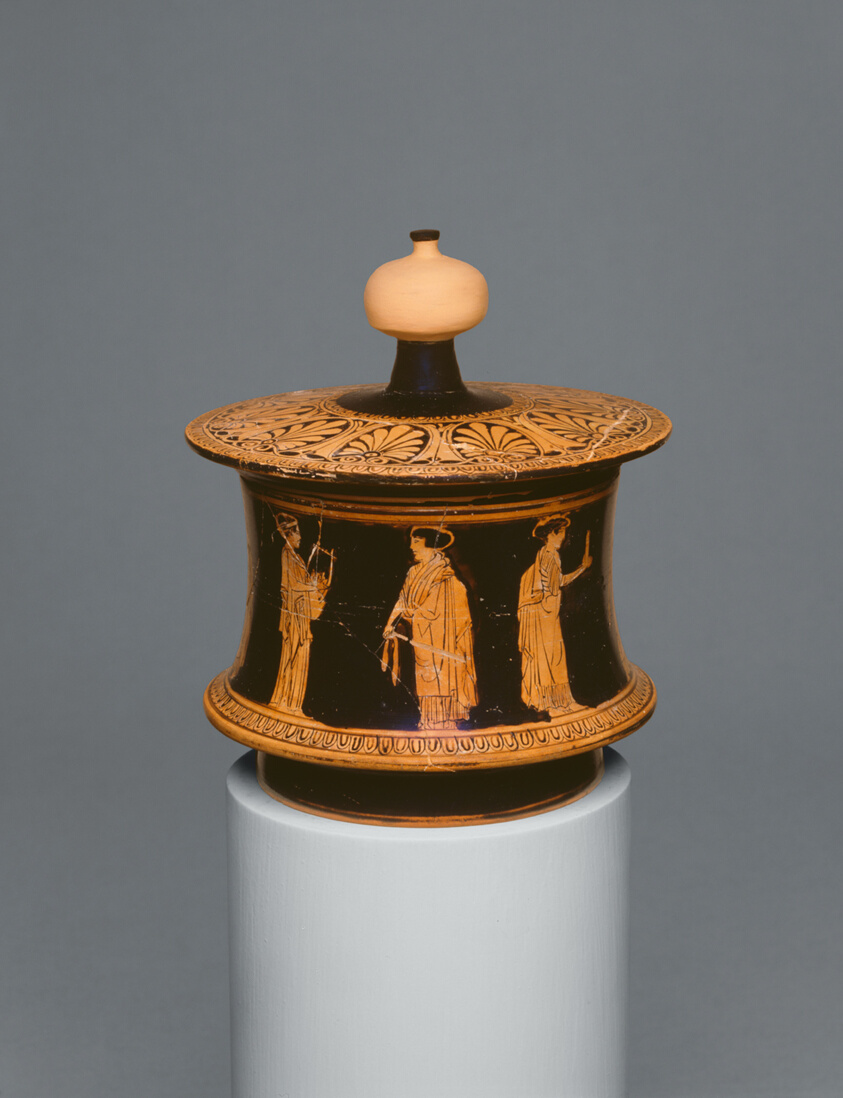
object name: Vessel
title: Pyxis (Container for Personal Objects)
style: greek, attic, ancient, red-figure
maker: Greek; Athens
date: 430-420 BCE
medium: terracotta, red-figure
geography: Athens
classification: vessel; ancient art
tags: beauty, rituals